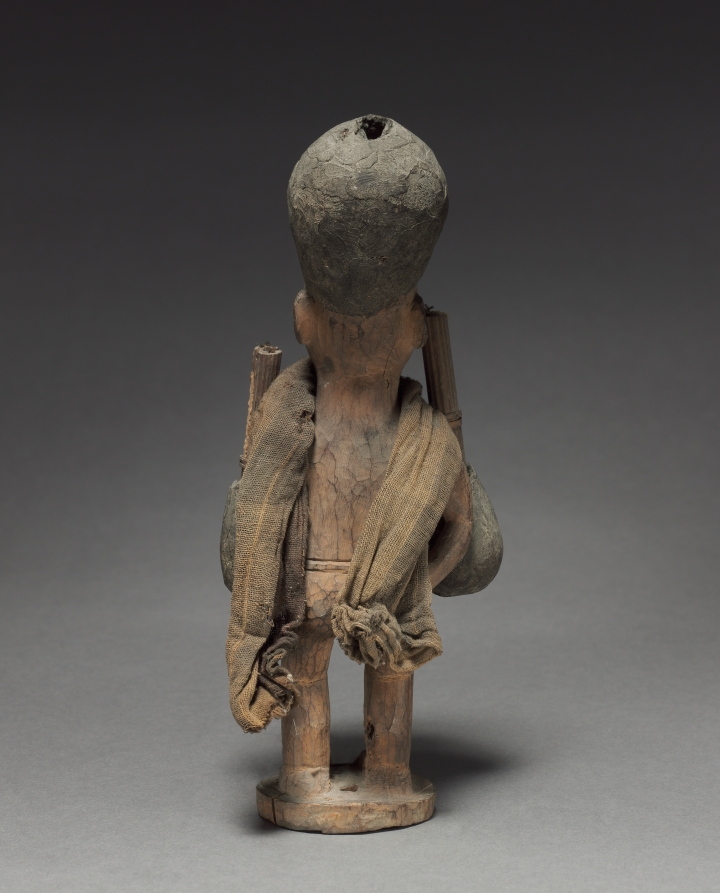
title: Power figure (nkisi)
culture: Africa, Central Africa, Republic of the Congo, Kongo-style maker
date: late 1800s–early 1900s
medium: Wood, organic materials (including resin), cloth, metalized glass, possibly porcelain, and plant fiber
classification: Sculpture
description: This figure is one of the two tallest of the seven anthropomorphic minkisi figurines previously in the Delenne collection. Identified as an nduda, two upward “guns” are attached on its side loaded with gunpowder used to shoot witches. Its label bears the word colique, a term referring to heavy pains caused by intestinal obstruction.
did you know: The object’s two small guns are pointing upward, but bears the label “colique,” a term referring to heavy pains caused by intestinal obstruction.